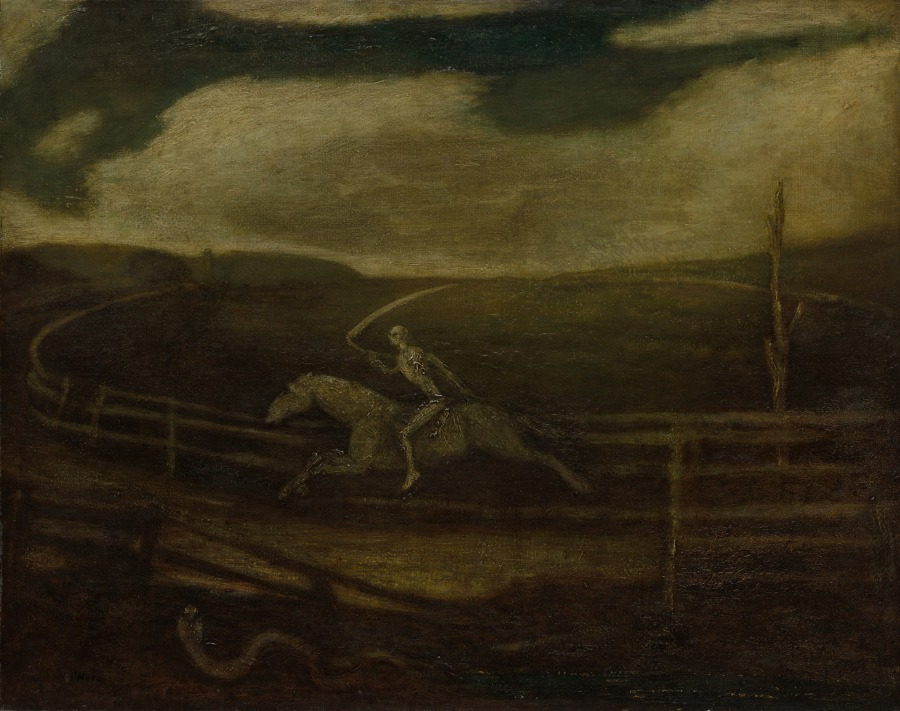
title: The Race Track (Death on a Pale Horse)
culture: America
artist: Albert Pinkham Ryder (American, 1847–1917)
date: c. 1896–1908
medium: oil on canvas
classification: Painting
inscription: Signed lower left: "A. P. Ryder"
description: Ryder’s subject was inspired by a horse race that took place in New York during 1888. One of the artist’s friends wagered $500 on the race and then died by suicide after the horse lost. Medieval symbolism infuses the composition: death appears as a skeleton on horseback holding a scythe with which he cuts down the living, while a snake—a sign of temptation and evil—slithers in the foreground. An intense man, Ryder worked on the painting for several years and was deeply reluctant to part with it.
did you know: Counterclockwise horse racing in the United States was not standardized until the 1920s.